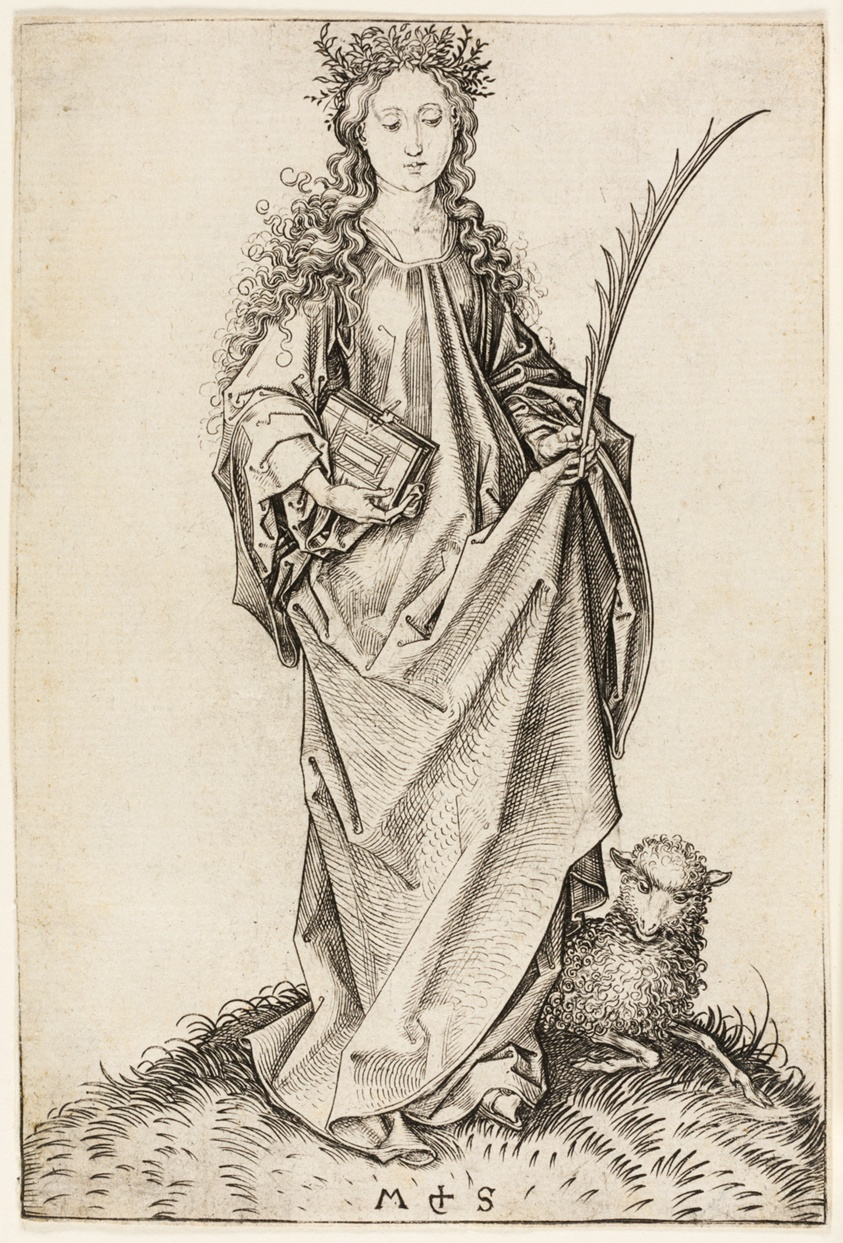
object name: Print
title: St. Agnes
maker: Martin Schongauer (German, c. 1430/50-1491)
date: c. 1470-1490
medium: Engraving on paper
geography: Germany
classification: engraving; print; prints and drawing